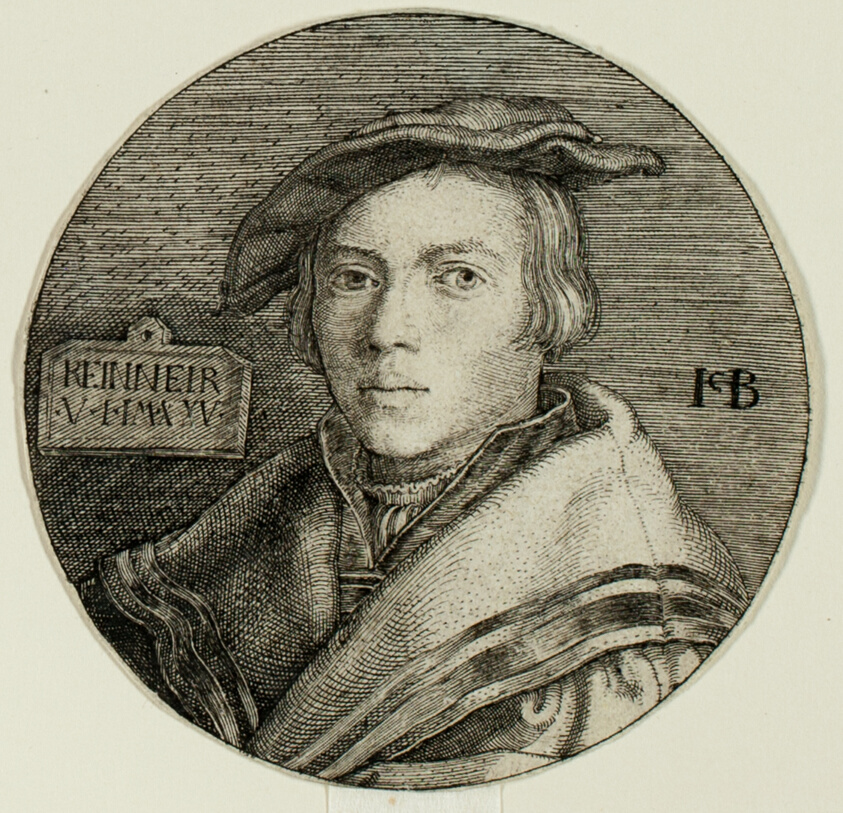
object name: Print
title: Portrait of Reinneir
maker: Jacob Binck (German, c. 1500-1569)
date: 1525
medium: Engraving and etching in black on buff laid paper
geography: Germany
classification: engraving; print; prints and drawing